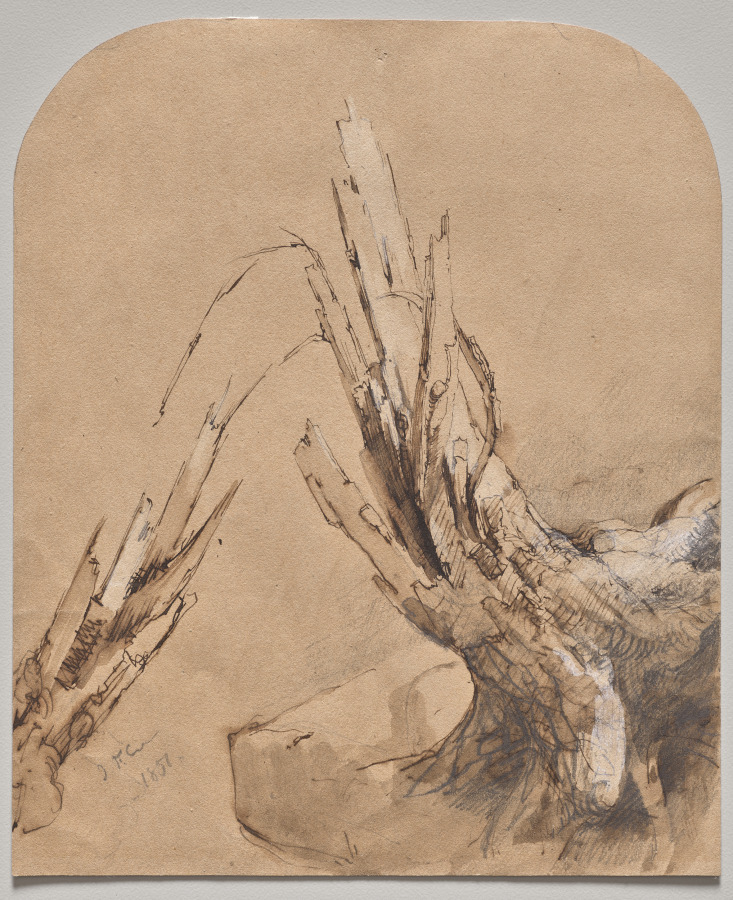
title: A Blasted Tree (recto)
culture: America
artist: Jasper F. Cropsey (American, 1823–1900)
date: 1851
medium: pen and brown ink, brown wash and graphite, heightened with white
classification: Drawing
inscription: signed, lower left, in graphite: J. F. C. / 1851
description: This detailed drawing of a blasted tree was a study for Cropsey’s painting The Cove--A Storm Scene in the Catskill Mountains (1851).